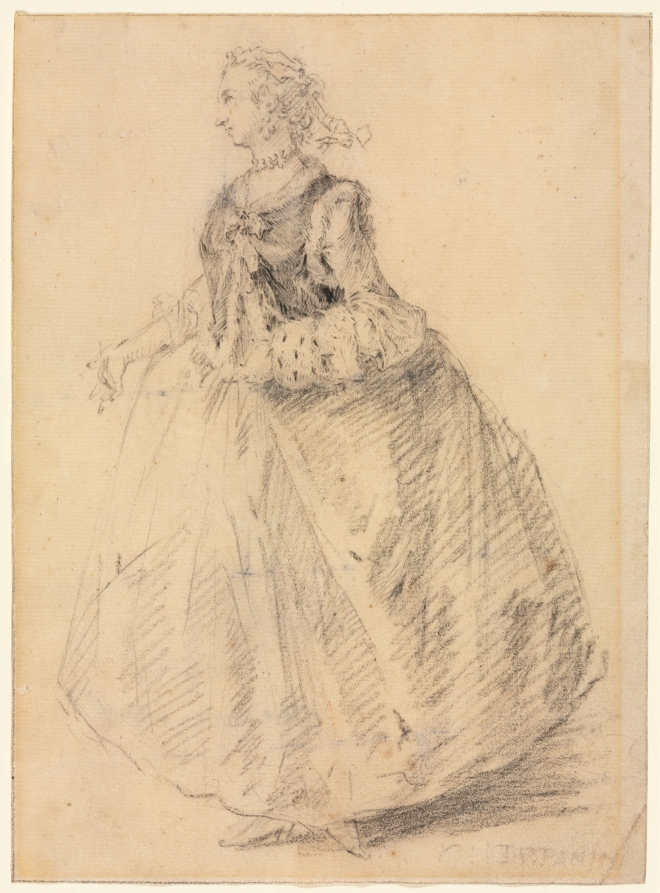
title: Standing Woman with an Ermine Muff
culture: Italy, 18th century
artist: Giovanni Paolo Panini (Italian, 1691–1765)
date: 18th century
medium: black chalk over graphite; framing lines in black chalk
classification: Drawing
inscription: signed, lower right, in graphite[?]: I.P. PANINI ; lower right, in graphite[?]: [G.?] ; VERSO, lower right, in black chalk(?): C[as?][illegible] ; lower right, in black chalk(?): [W?]